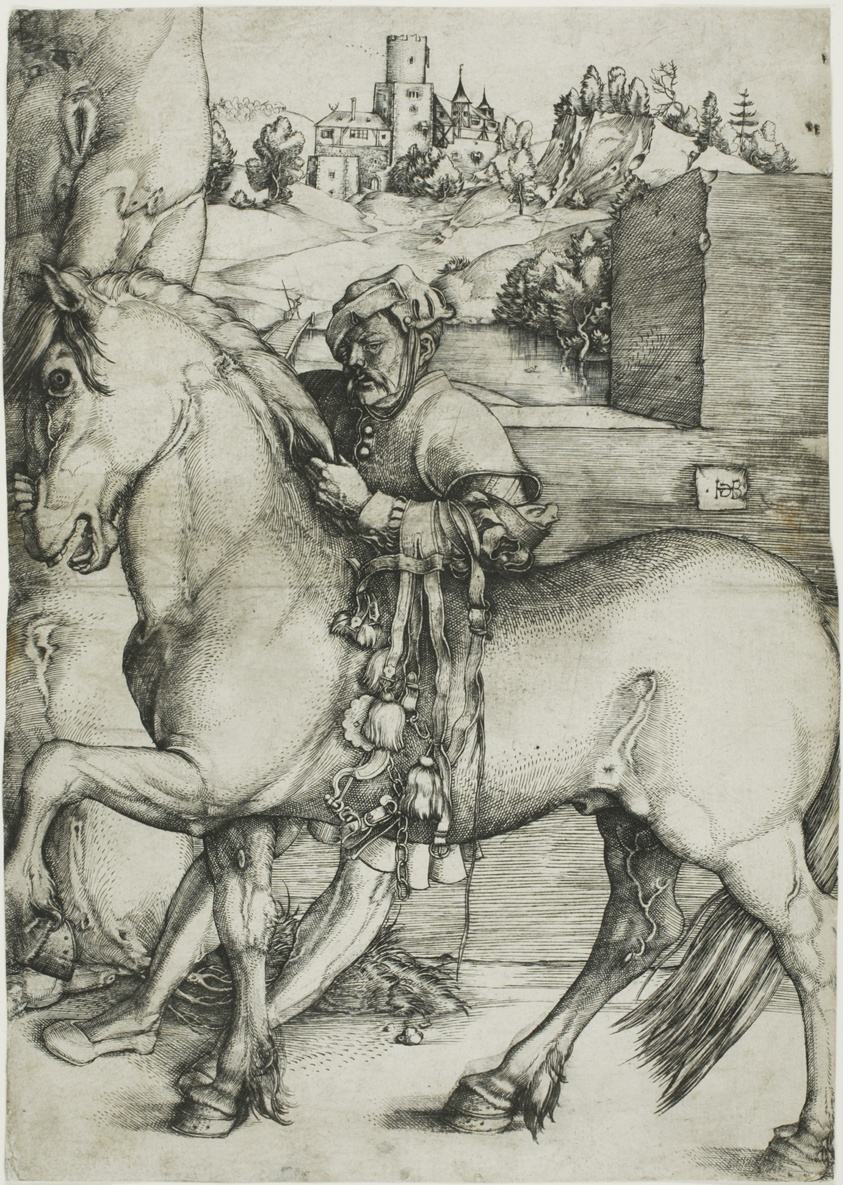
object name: Print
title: A Groom Bridling a Horse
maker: Hans Baldung Grien (German, 1484/85-1545)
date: early 1540s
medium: Engraving in black on ivory laid paper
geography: Germany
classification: engraving; print; prints and drawing